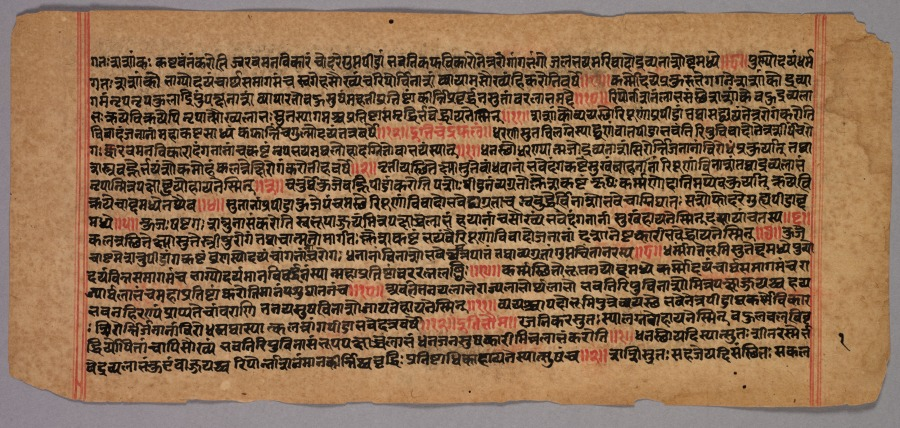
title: Page from a Jaina Manuscript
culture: India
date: 1400s–1500s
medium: ink on paper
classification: Manuscript